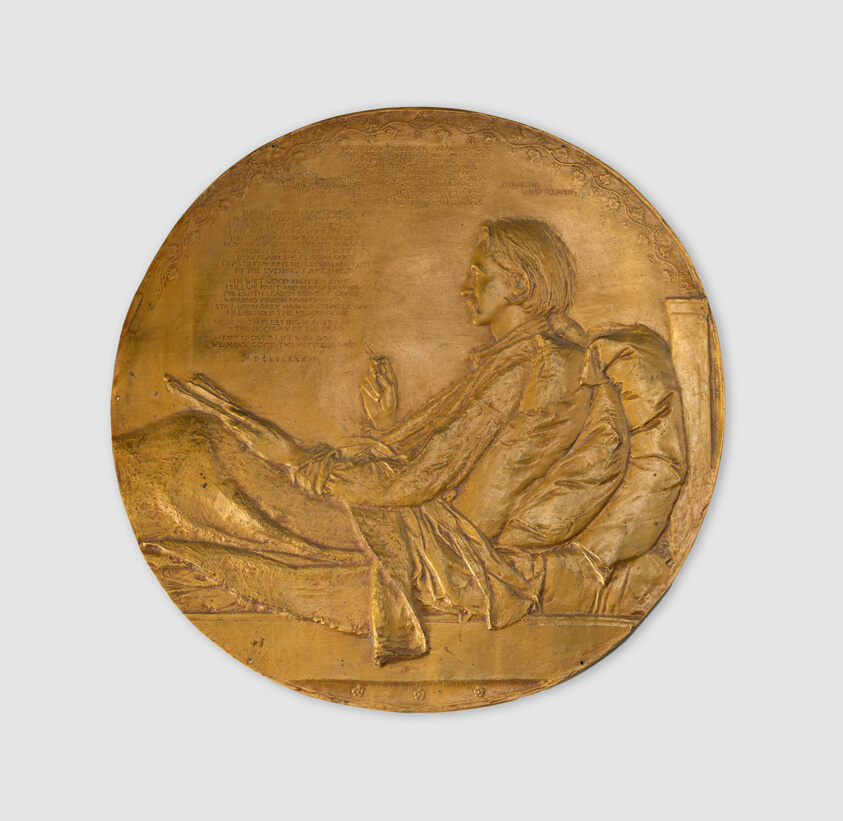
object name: Sculpture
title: Robert Louis Stevenson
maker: Augustus Saint-Gaudens (American, born Ireland, 1848–1907)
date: Modeled 1887–88, cast 1888–1928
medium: Bronze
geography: New York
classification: sculpture; american arts